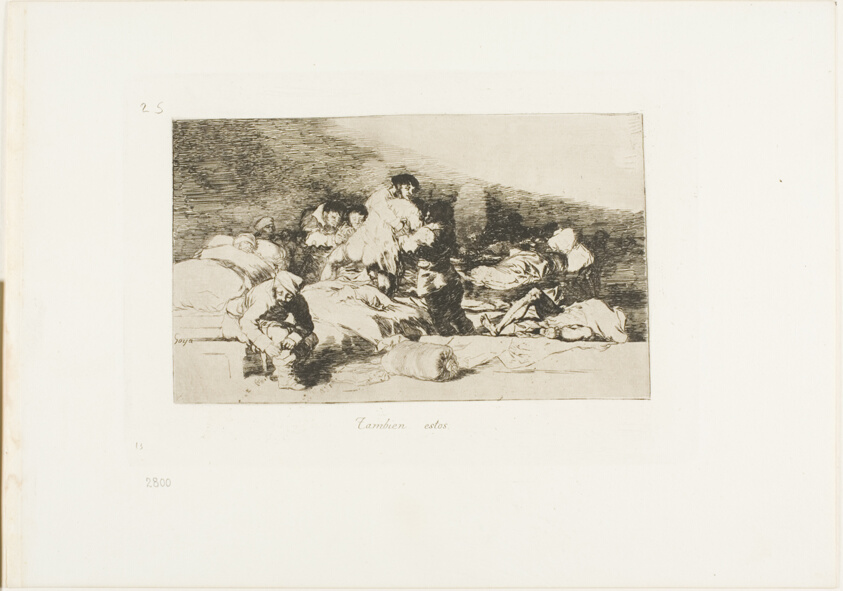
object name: Print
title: These too, plate 25 from The Disasters of War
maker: Francisco José de Goya y Lucientes (Spanish, 1746-1828)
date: 1810/12, published 1863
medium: Etching, drypoint and burin on ivory wove paper with gilt edges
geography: Spain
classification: etching; print; prints and drawing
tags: war